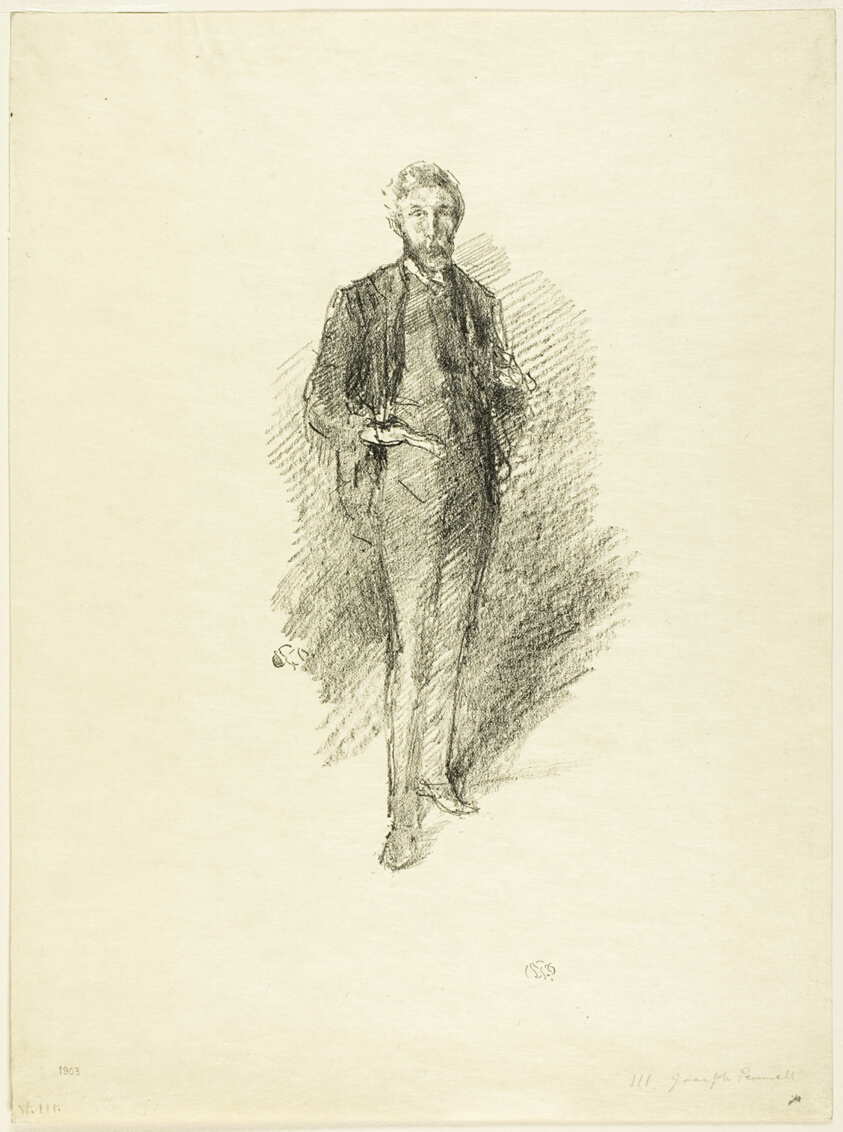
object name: Print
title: Study: Joseph Pennell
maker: James McNeill Whistler (American, 1834-1903)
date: 1896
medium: Transfer lithograph in black on cream wove Japanese vellum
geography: United States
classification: transfer lithograph; lithograph; print; prints and drawing